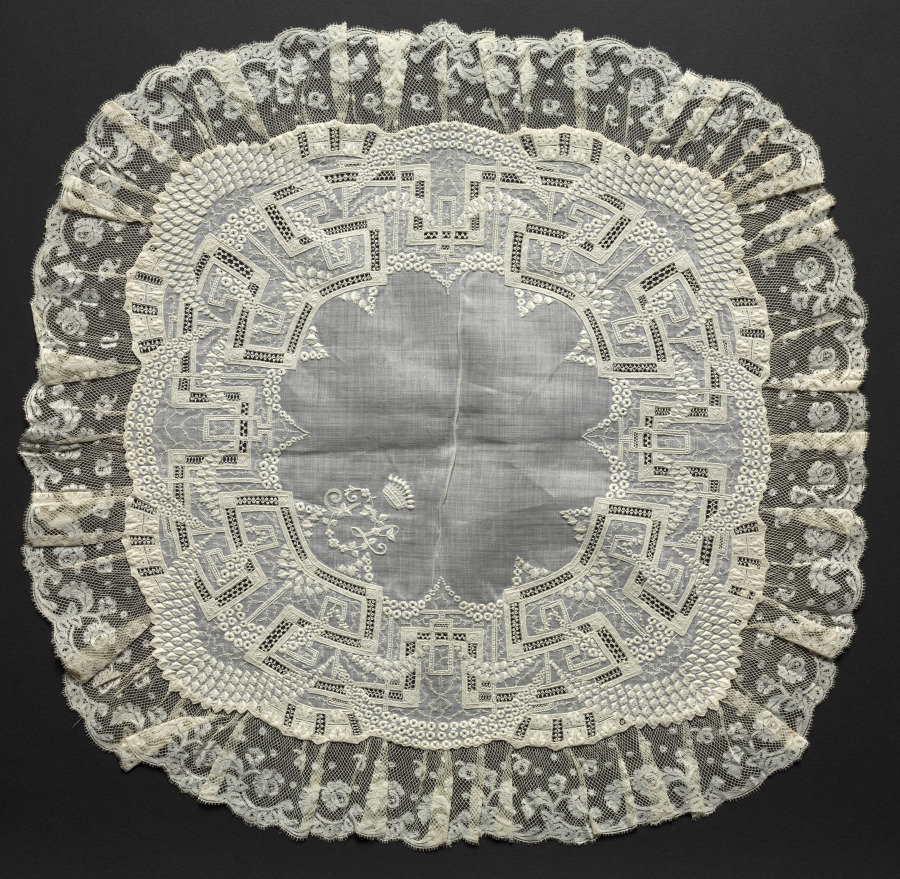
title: Lace Handkerchief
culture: Switzerland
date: 1700s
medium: linen: embroidery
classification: Embroidery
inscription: beneath a nine-point coronet in one corner: "P.L."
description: This handkerchief has an embroidered monogram in one corner: the initials P. L. beneath a nine-point coronet.